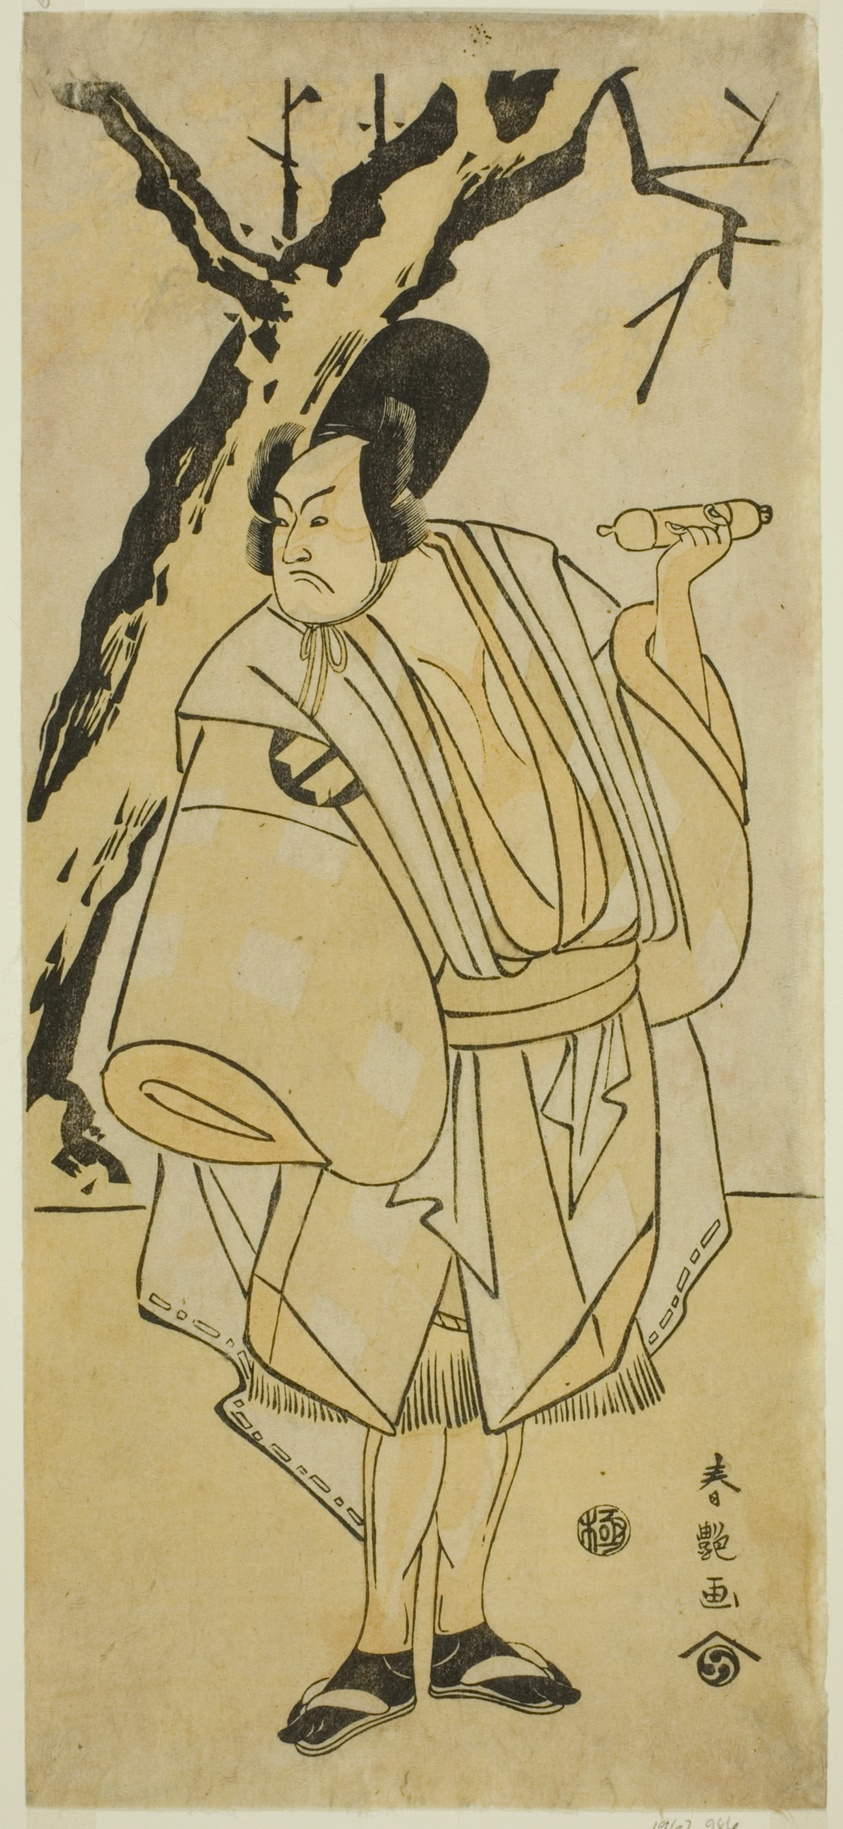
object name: Print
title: The Actor Sakata Hangoro III as the Guard Yahazu no Yadahei in the Play Otokoyama O-Edo no Ishizue, Performed at the Kiri Theater in the Eleventh Month, 1794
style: Japanese (culture or style)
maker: Katsukawa Shun'en (Japanese, active c. 1790)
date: c. 1794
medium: Color woodblock print; hosoban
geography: Japan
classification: woodblock print; print; asian art